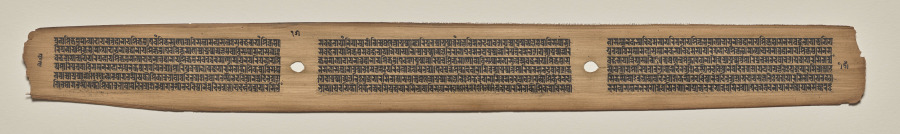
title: Text, Folio 15 (verso), from a Manuscript of the Perfection of Wisdom in Eight Thousand Lines (Ashtasahasrika Prajnaparamita-sutra)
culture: Eastern India, Bihar, Vikramashila Monastery. Painting: Nepal, Kathmandu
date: Sunday, September 14, 1119 (year 239 of the Newar Samvat in the month of Ashvina)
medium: gum tempera and ink on palm leaves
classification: Painting